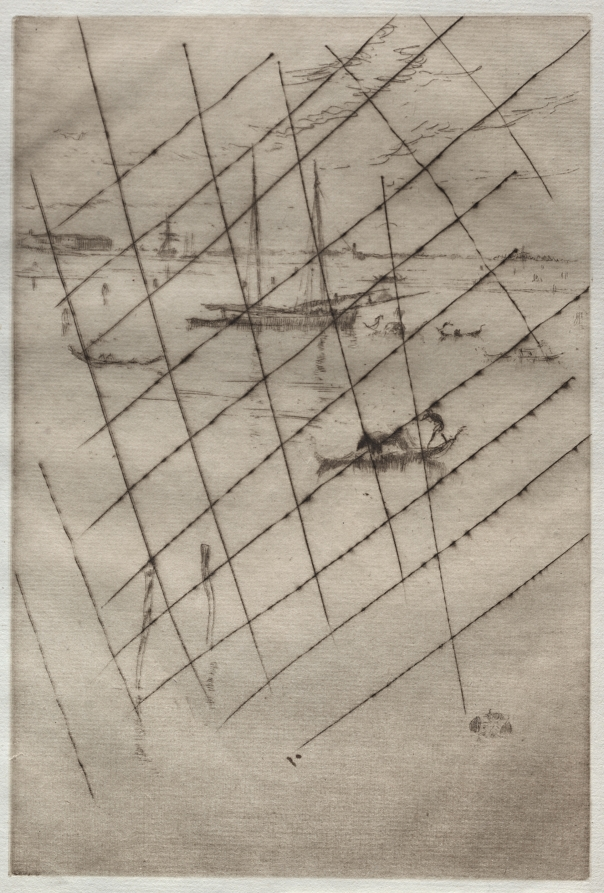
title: The Little Lagoon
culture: America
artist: James McNeill Whistler (American, 1834–1903)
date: 1880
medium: etching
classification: Print